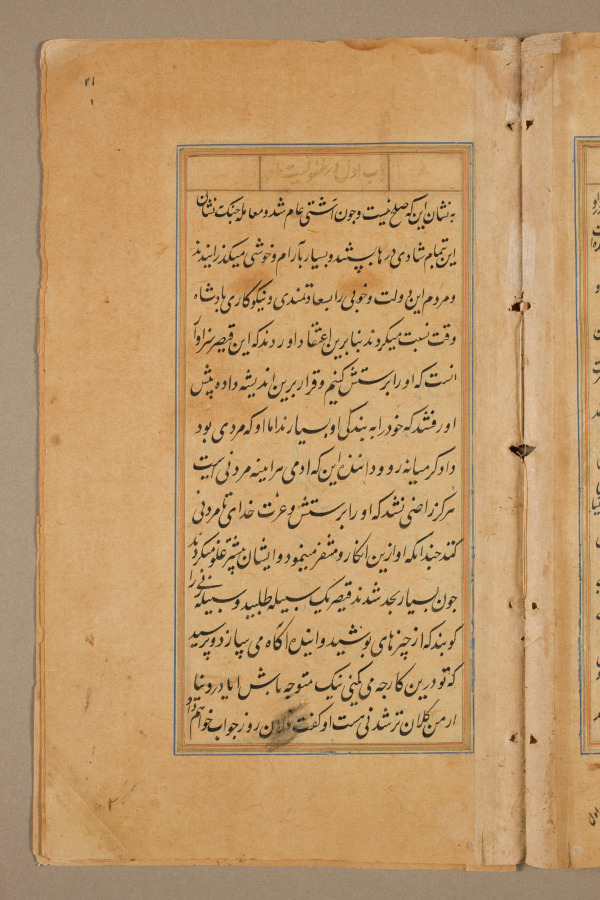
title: Text page from a Mirror of Holiness (Mir’at al-quds) of Father Jerome Xavier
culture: Mughal India, Allahabad, made for Prince Salim (1569–1627)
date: 1602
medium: Ink and gold on paper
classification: Manuscript